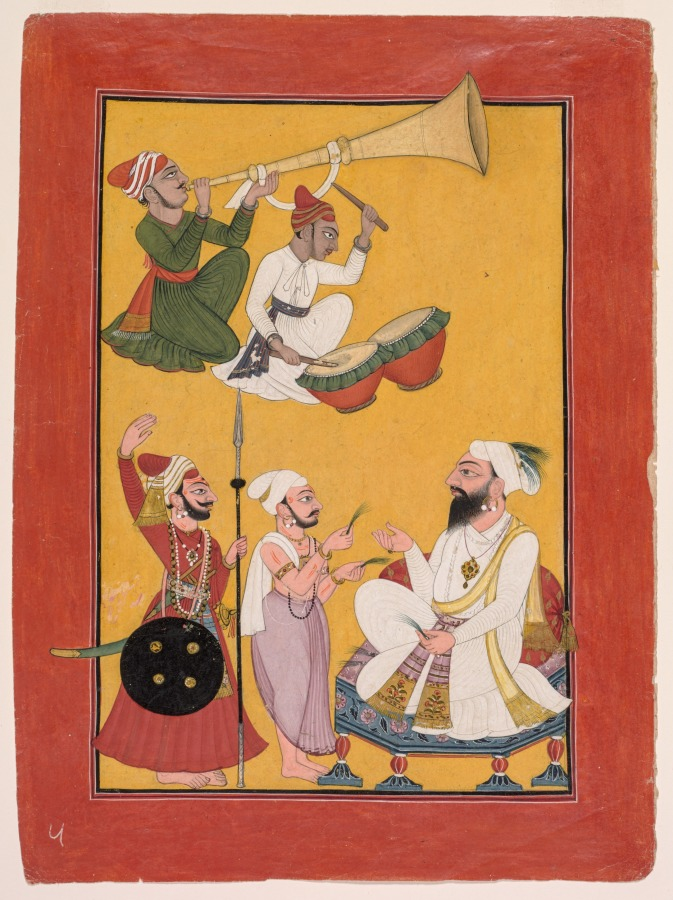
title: Celebrations of Krishna's Birth, from a Bhagavata Purana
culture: Northern India, Pahari kingdoms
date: c. 1725–30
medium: Gum tempera and gold on paper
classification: Painting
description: The Hindu kingdom of Mankot in the western foothills of the Himalayas developed a bold style of painting in which figures in strict profile stand out against an intense yellow ground. Musicians enthusiastically proclaim the arrival of infant Krishna at the village of Vraj, where he was brought as a newborn to grow to maturity in safety among the cowherders. He was secreted away from the evil king Kamsa who wanted to murder the child on account of a prophecy that foretold his own death by Krishna. Krishna’s adoptive father Nanda, the village headmaster, receives tufts of grass as tokens of congratulations from a well-wisher, while a soldier salutes him.